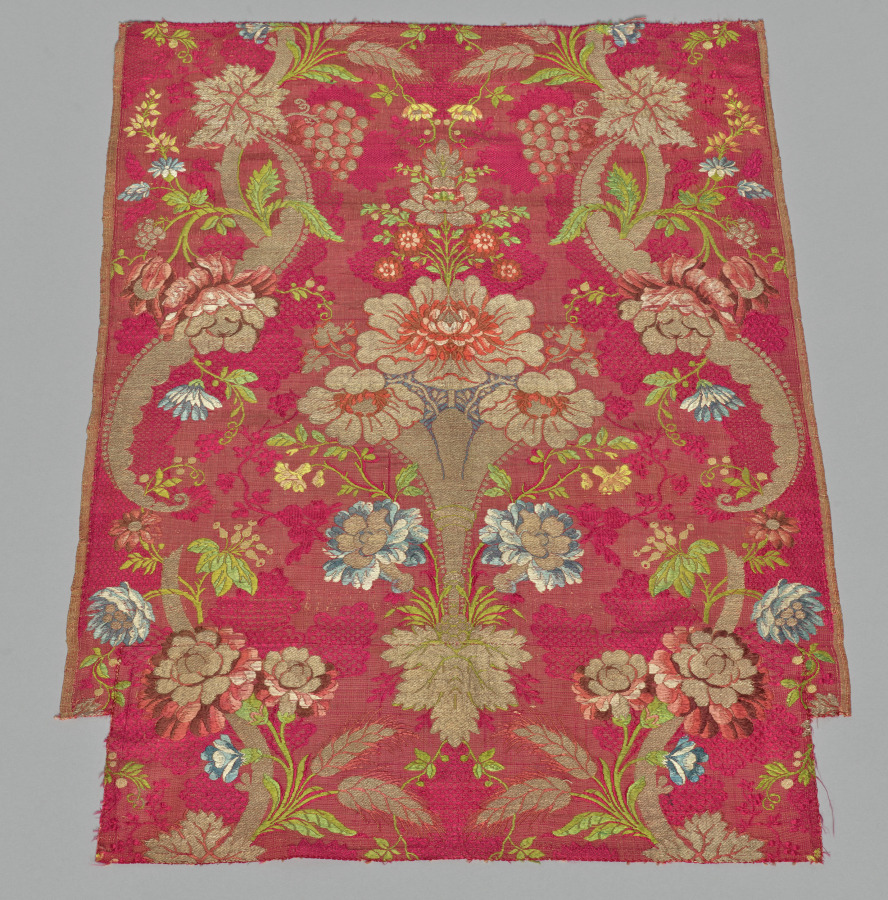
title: Silk Fragment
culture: Spain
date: 1700s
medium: plain compound cloth, brocaded; silk and metal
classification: Textile